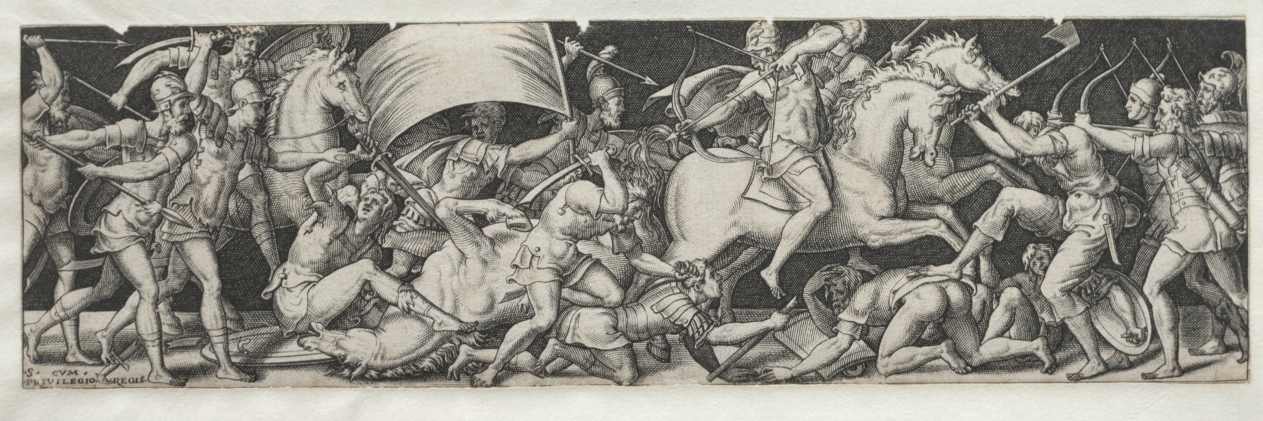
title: Combats and Triumphs No. 9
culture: France, 16th century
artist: Etienne Delaune (French, 1518/19-c. 1583)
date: c. 1550–72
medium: engraving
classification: Print